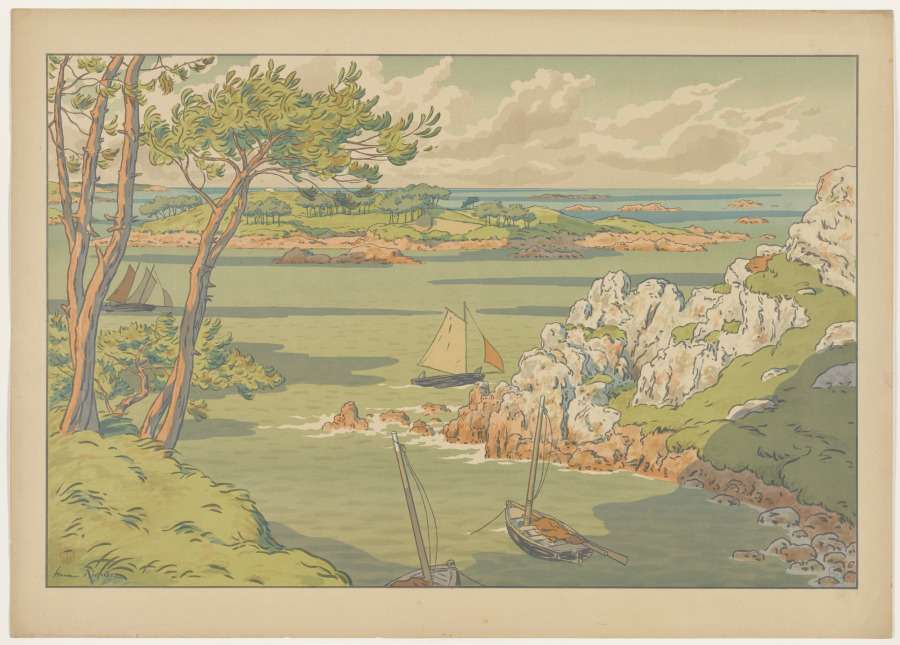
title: Aspects of Nature: The Island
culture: France, 19th century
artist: Henri Rivière (French, 1864–1951)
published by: Printed by Verneau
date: 1898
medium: color lithograph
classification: Print